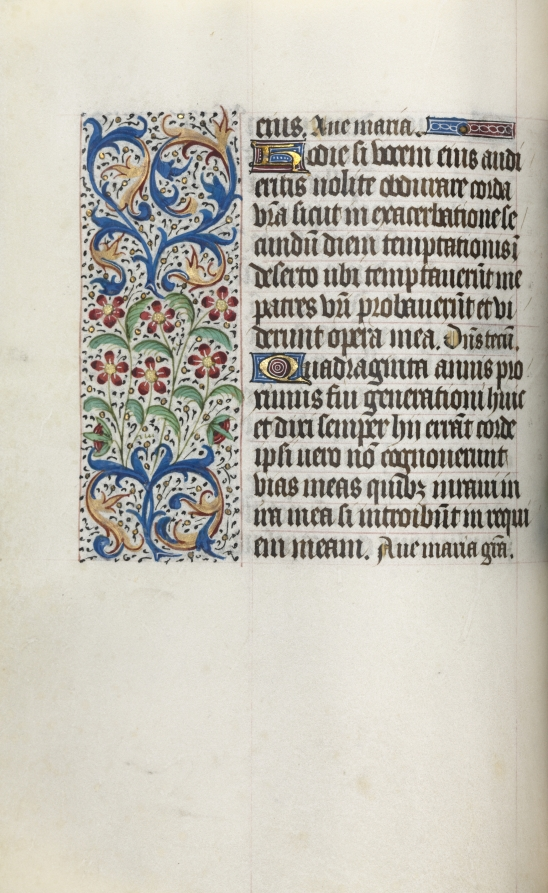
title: Book of Hours (Use of Rouen): fol. 29v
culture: France, Rouen, 15th century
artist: Master of the Geneva Latini (French, active Rouen, 1460–80)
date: c. 1470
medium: ink, tempera, and gold on vellum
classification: Bound Volume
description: In the late 1400s and early 1500s Rouen was an established and important center of book production. The city’s cathedral had a wealthy chapter that spent large sums of money to commission books and to maintain its extensive library. The stationers and booksellers would have likely been concentrated in or near the cathedral precinct. This artist, named after a manuscript now in Geneva, was Rouen’s principal illuminator during the second half of the 1400s.